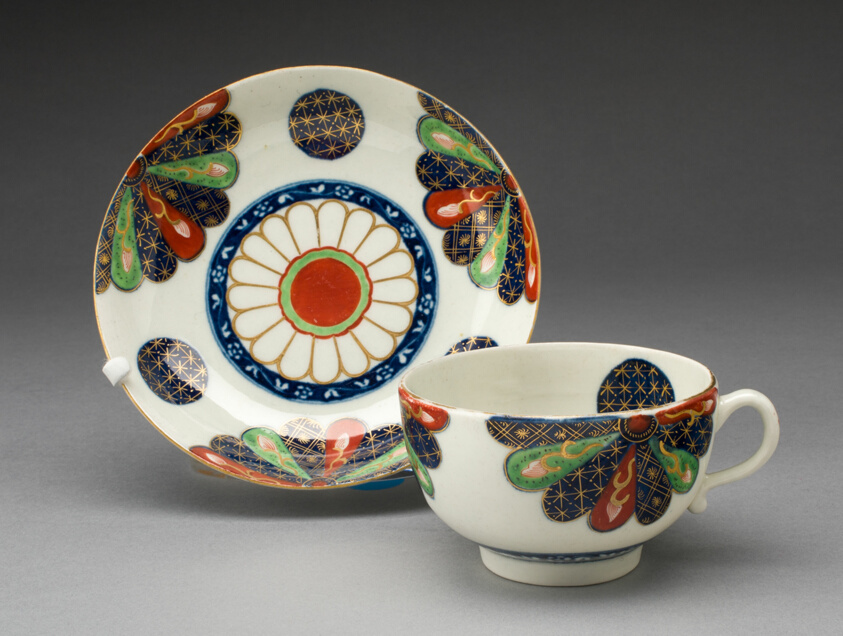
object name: Ceramics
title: Teacup and Saucer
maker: Worcester Porcelain Factory (Warmstry House Period, 1751–1783); Worcester, England, founded 1751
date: c. 1770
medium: Soft-paste porcelain, polychrome enamels and gilding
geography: Worcester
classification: drinking vessel; teaware; porcelain; european decorative arts; ceramics